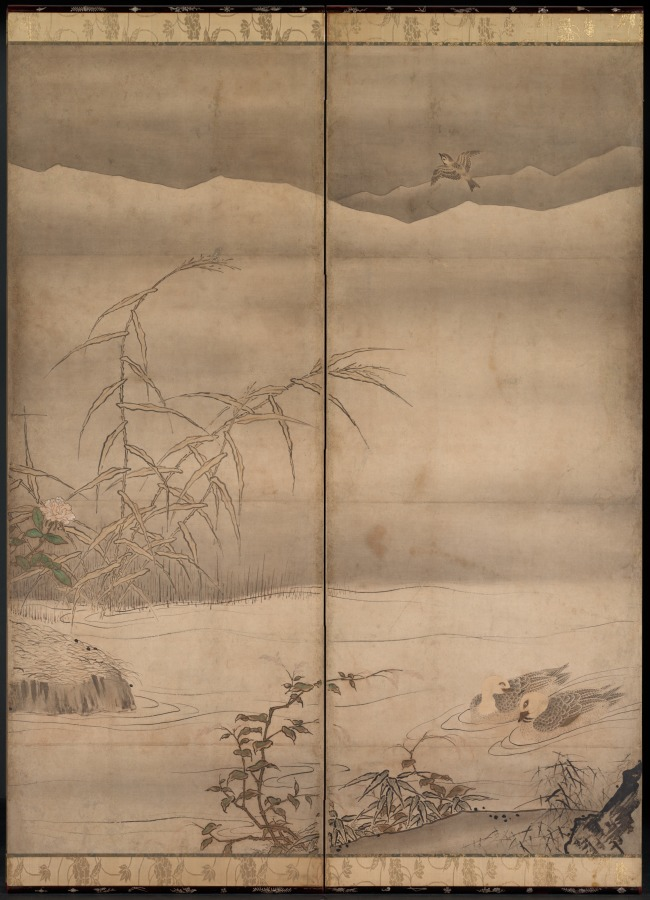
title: Birds and Flowers in a Landscape of the Four Seasons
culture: Japan, Muromachi period (1392–1573)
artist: follower of Sesshū Tōyō (Japanese, 1420–1506)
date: 1550–99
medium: Six-panel folding screen, ink and color on paper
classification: Painting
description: The monk-painter Sesshū is revered today, as he was in his own time. While he left Kyoto's sophisticated intellectual and cultural environment to live in a provincial village in a far western province, he seems never to have severed contacts with the monastic communities of his young adulthood. His residence in Yamaguchi proved fortuitous because his patron, the region's military lord, enjoyed considerable freedom in conducting trade missions overseas with Korea and China. Sesshū went to China in 1467 and traveled about the country, visiting well-known historical sites and Chan (Zen) temples before returning two years later. Thus he became familiar with contemporary painting practices, materials, formats, and subject matter. His assimilation and then transmission of these elements had a profound impact on the following generations of ink painters, patrons, and Zen communities throughout Japan. Despite the presence on these byōbu of the name "Sesshū," they are from the hand of another accomplished but as yet anonymous follower active in the middle of the sixteenth century. Sesshū's name here, as on a handful of similar bird-and-flower byōbu, attests to the master's identification at that time with the colorful mural paintings on the same theme emanating from Ming dynasty China. This genre had heretofore been relegated to hanging scroll compositions, so the intro-duction into temple and daimyo residences of such an attractive theme surely caused considerable excitement in the later fifteenth century, when in all likelihood Sesshū introduced it into the Japanese painting repertoire. Subsequently, artists of varying backgrounds and training tried their hands at these large, dramatic scenes. From right to left the composition portrays an array of flowering plants in the near distance that indicate the passage of the seasons. Birds, usually paired, occupy this setting, engaged in various activities that lend naturalism and an air of peacefulness. The world they inhabit may be characterized pictorially by expansive middle-ground waterscapes that end where the far distant mountains rise as backdrops. These features appear consistently in other bird-and-flower byōbu attributed to Sesshū. Also noteworthy is the absence of any birds of prey such as the samurai's beloved hawks, emblems of fierceness and graceful strength that appear often in the byōbu of sixteenth-century Kano and Soga school painters.